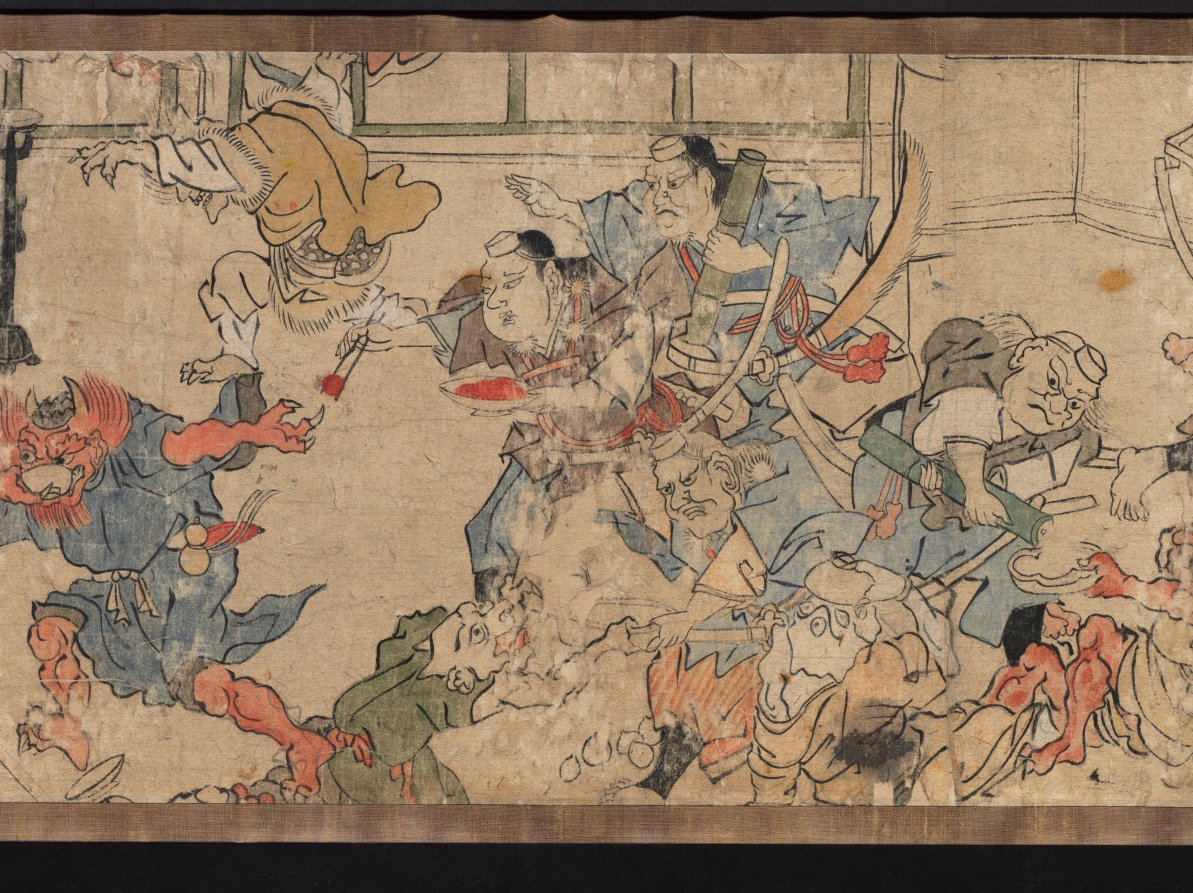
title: Oeyama Engi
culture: Japan, Edo period (1615–1868)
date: 1615–1868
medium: one of a pair of handscrolls; ink and color on paper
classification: Painting